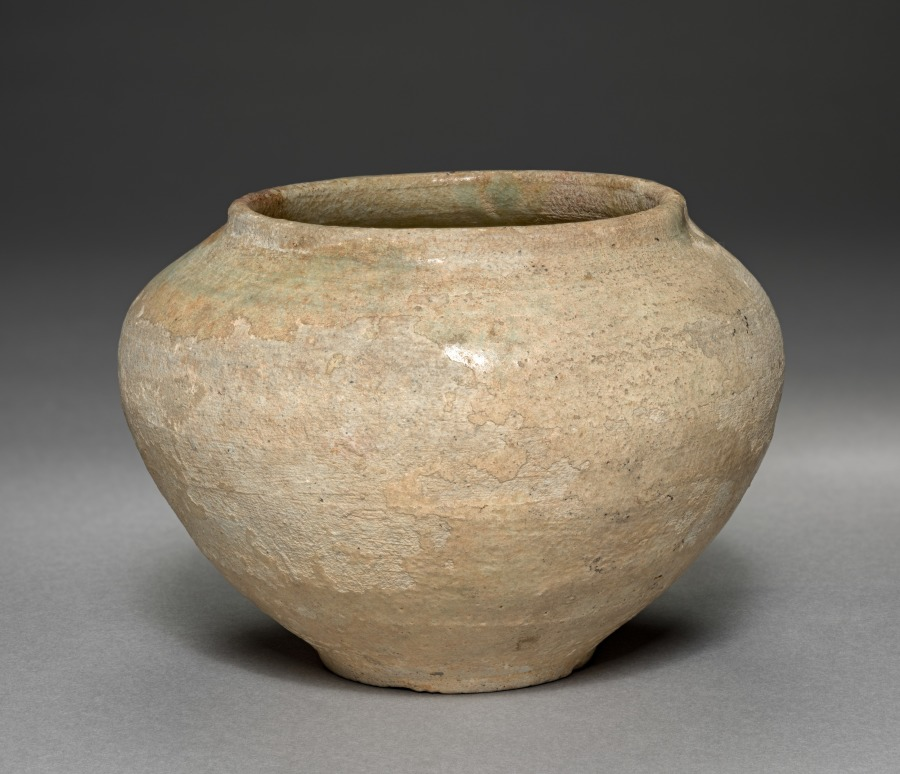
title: Jar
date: 1100s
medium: Pottery, glazed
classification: Ceramic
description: This jar is one of the rare porcelain examples from the Goryeo period (918–1392). In Korea at that time, both celadons and porcelains were produced in the same kilns, explaining why this porcelain jar bears a greenish blue glaze.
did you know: This jar is one of the rare porcelain examples from the Goryeo period (918–1392).